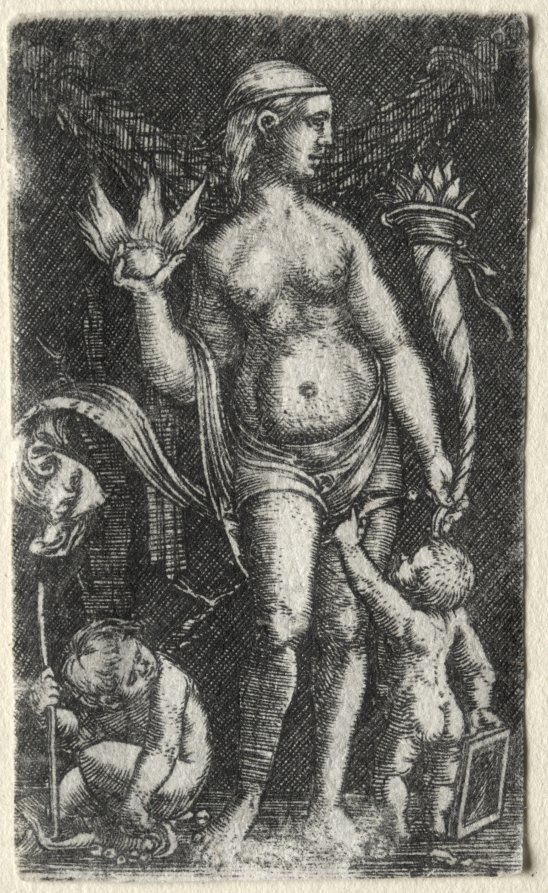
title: Venus between two cupids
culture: Germany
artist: Albrecht Altdorfer (German, c. 1480–1538)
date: 1520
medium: engraving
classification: Print